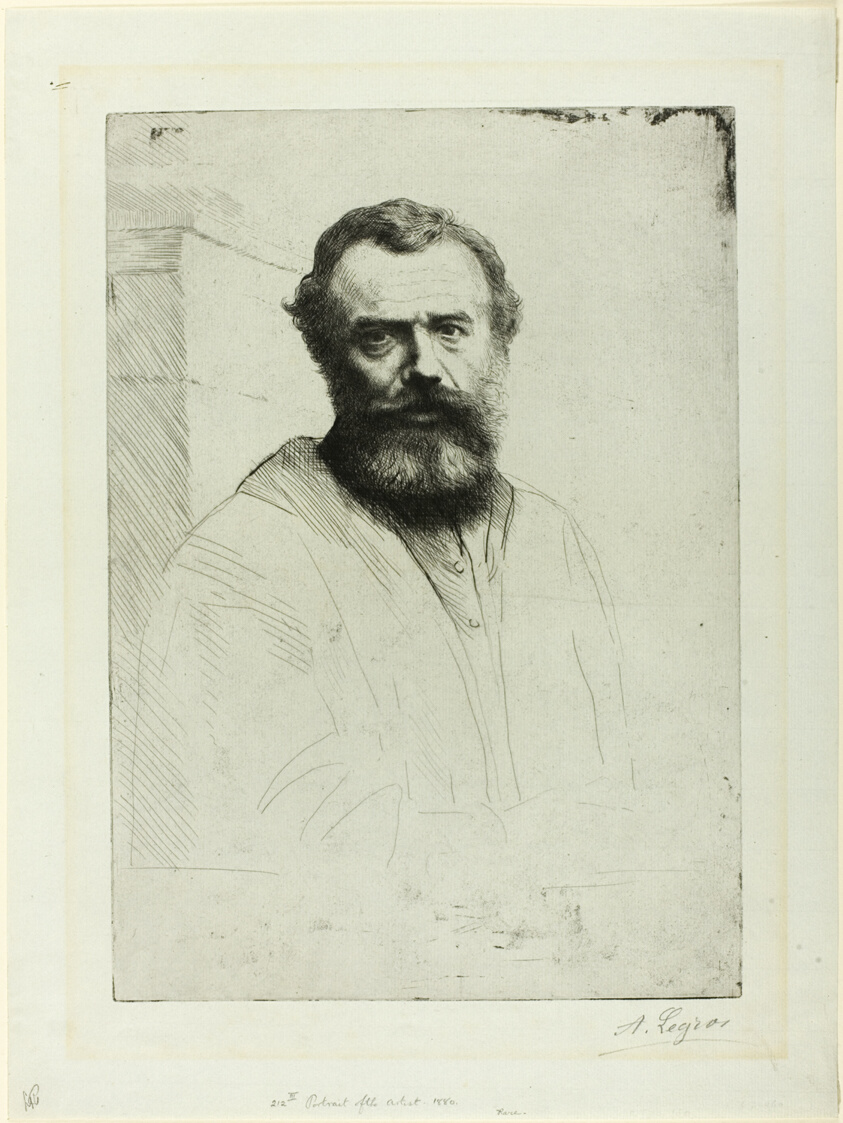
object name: Print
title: Portrait of the Artist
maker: Alphonse Legros (French, 1837-1911)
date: 1880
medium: Etching and drypoint on light blue laid paper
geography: France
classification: engraving; print; prints and drawing